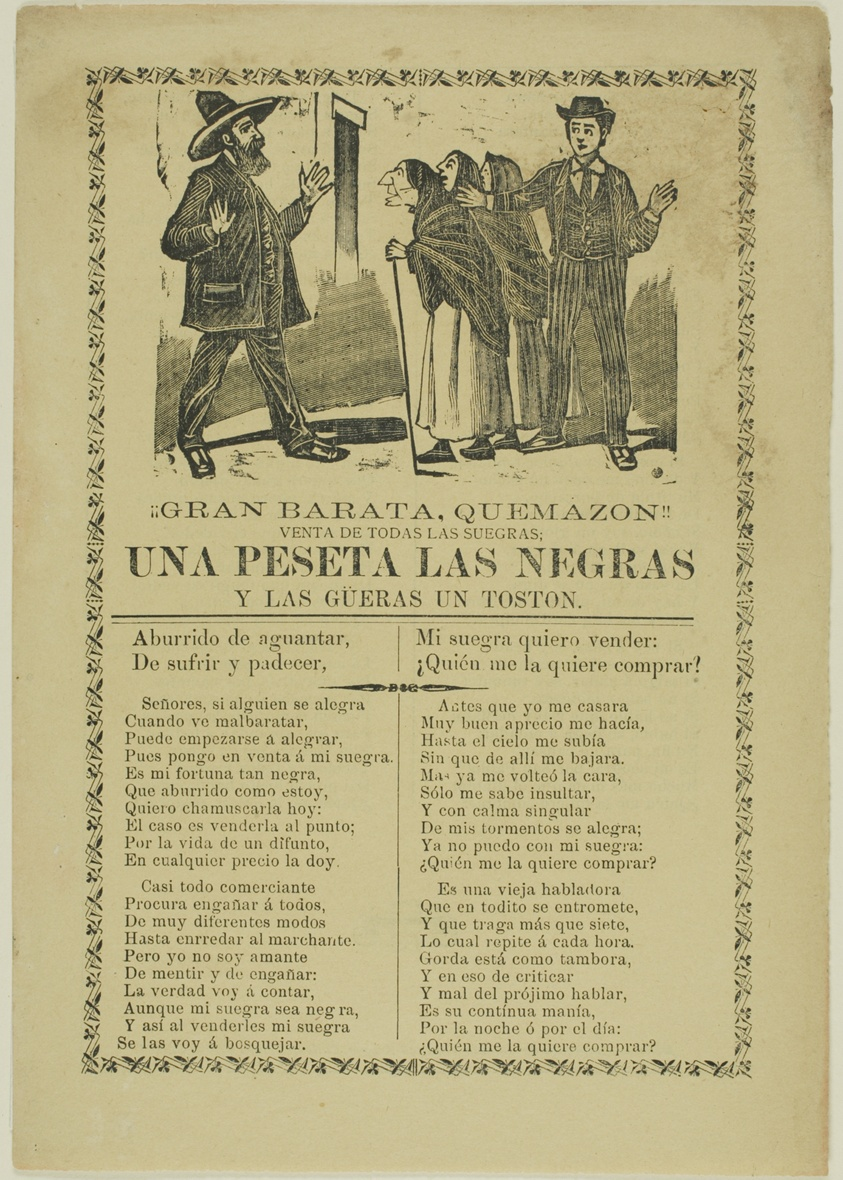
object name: Print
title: Great Bargain Sale, Selling All Mother-in-Laws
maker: José Guadalupe Posada (Mexican, 1852-1913)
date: 1880–1913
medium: Relief engraving on wove paper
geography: Mexico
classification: woodcut; print; prints and drawing